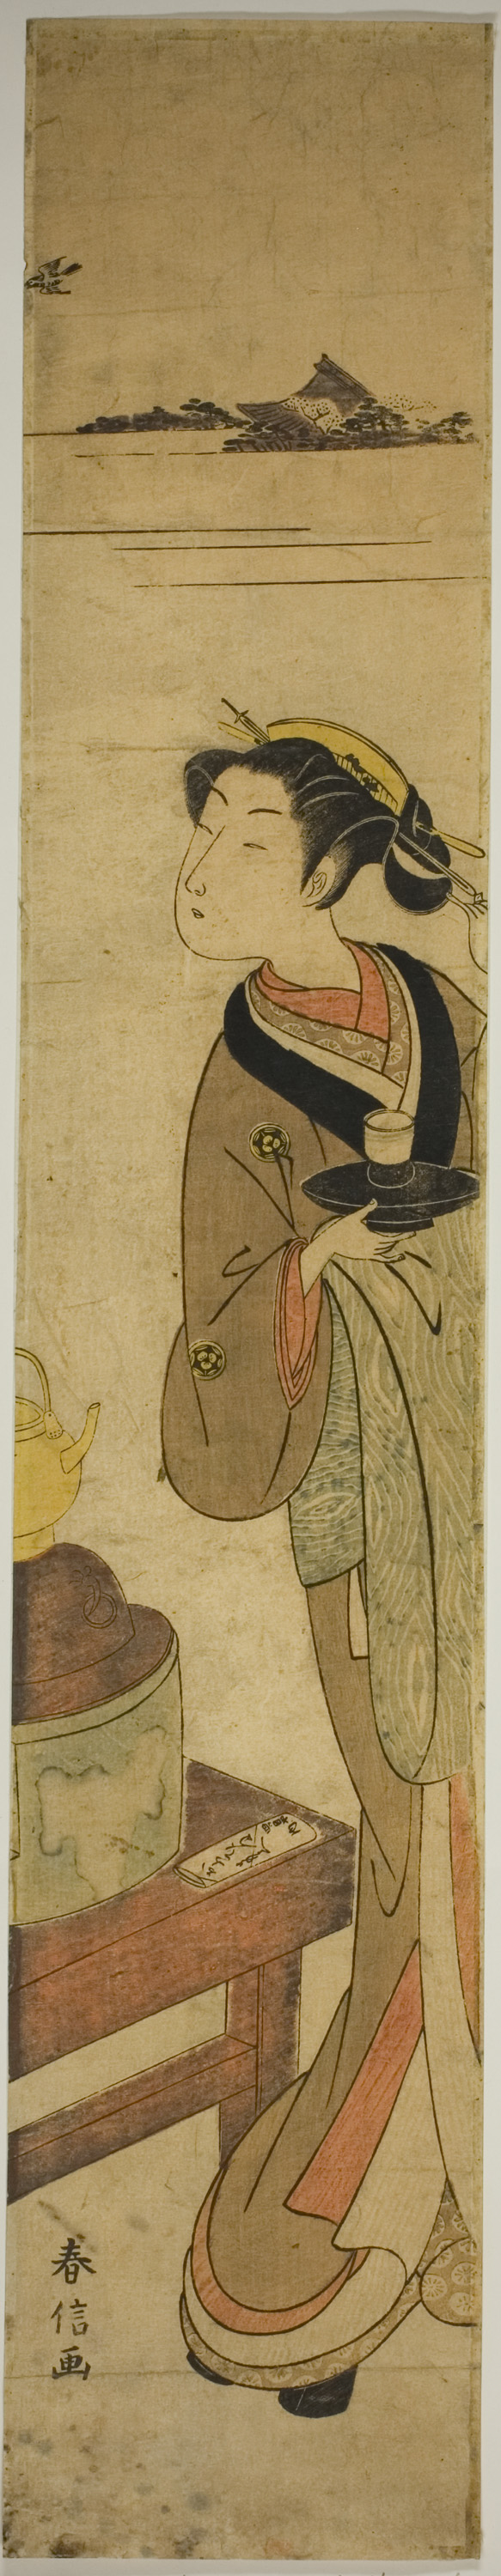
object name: Print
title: The Waitress Osen of the Kagiya teahouse Carrying a Cup of Tea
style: Japanese (culture or style), edo (japanese period), Japanism, East Asian, asian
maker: Suzuki Harunobu 鈴木 春信; Japanese, 1725 (?)-1770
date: c. 1769/70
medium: Color woodblock print; hashira-e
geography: Japan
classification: woodblock print; print; asian art